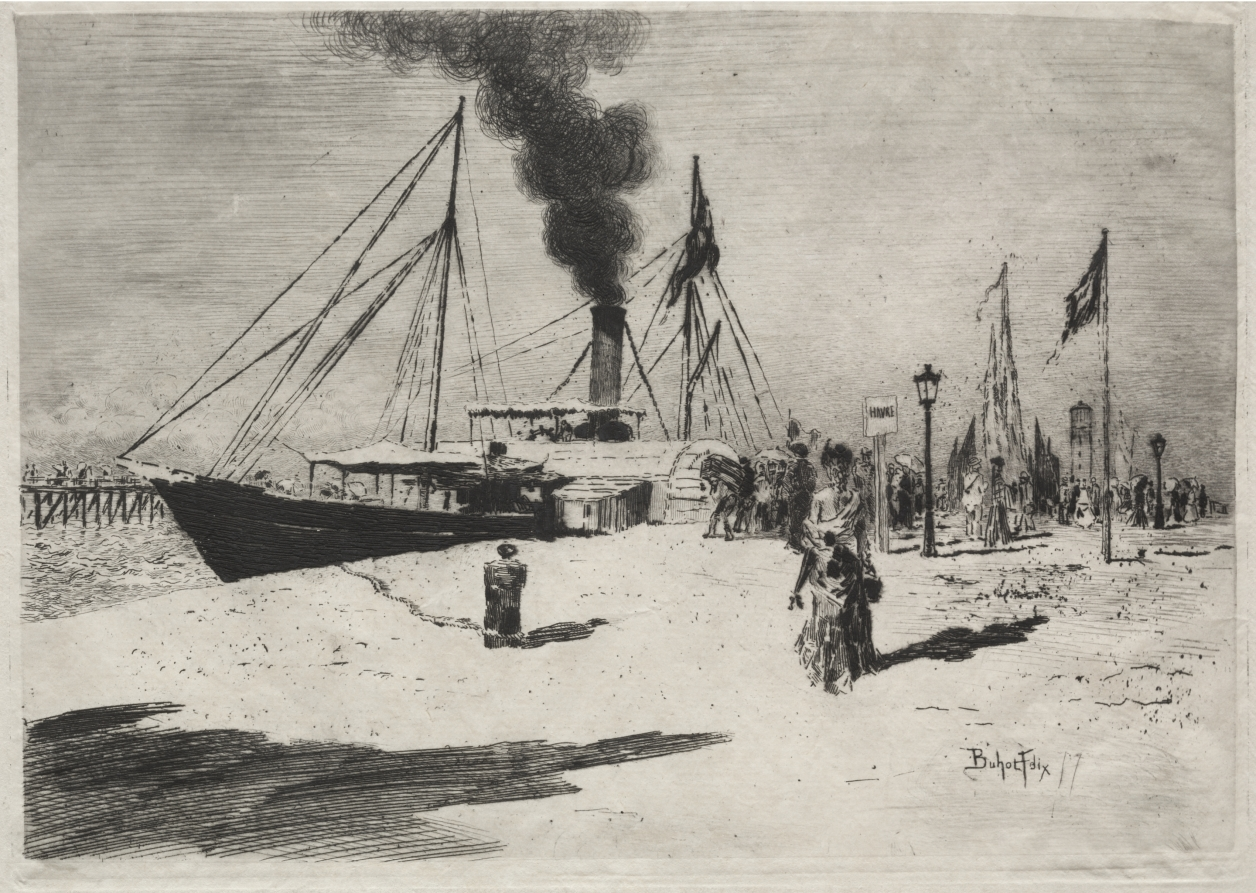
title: The Wharf at Trouville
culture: France, 19th century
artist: Félix Hilaire Buhot (French, 1847–1898)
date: 1877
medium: etching and drypoint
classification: Print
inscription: signed and dated, lower right, in plate: "Buhot Felix 77"